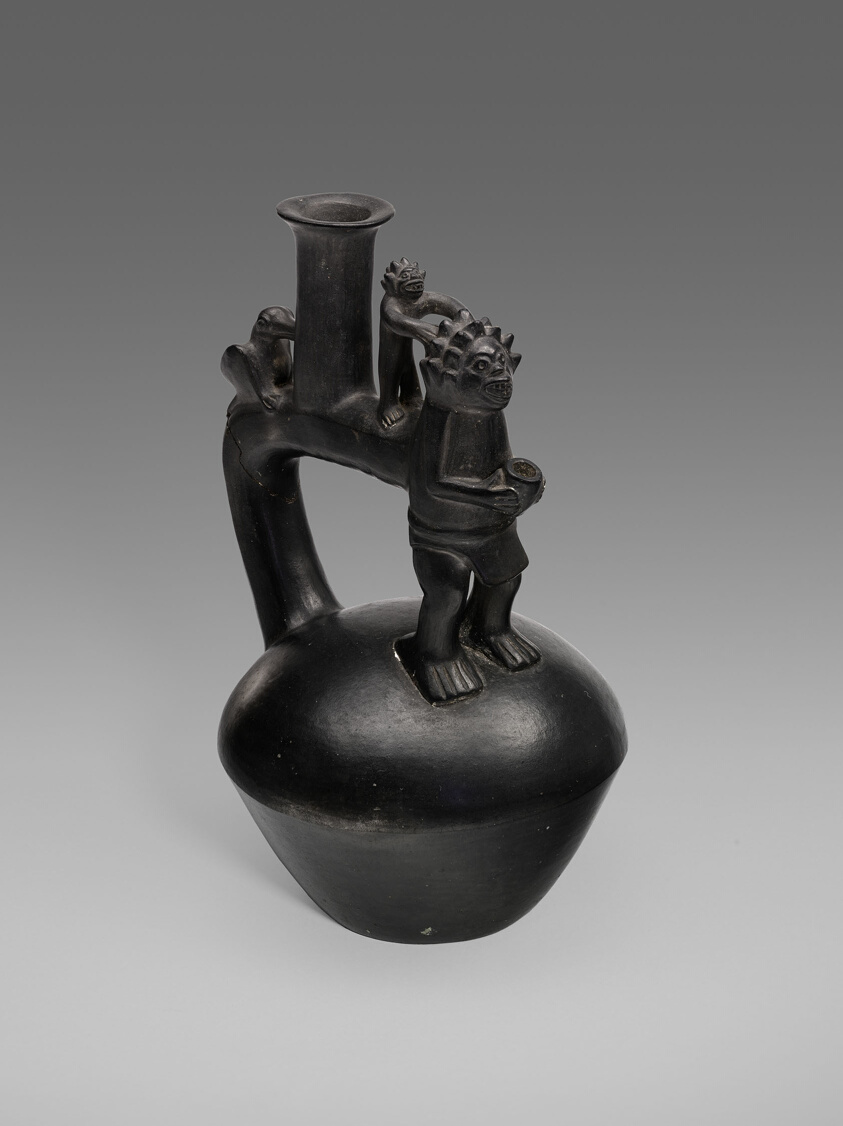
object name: Vessel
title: Vessel Depicting a Standing Figure with an Attendant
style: chimú, late intermediate period, Pre-Columbian, americas, inca, andes, Arts of the Americas, andean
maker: Chimú-Inca; North coast, Peru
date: 1200–1450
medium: Ceramic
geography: Peruvian North Coast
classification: blackware (black basaltes); earthenware; ceramics; vessel; art of the americas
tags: figures (representations), bird, ritual